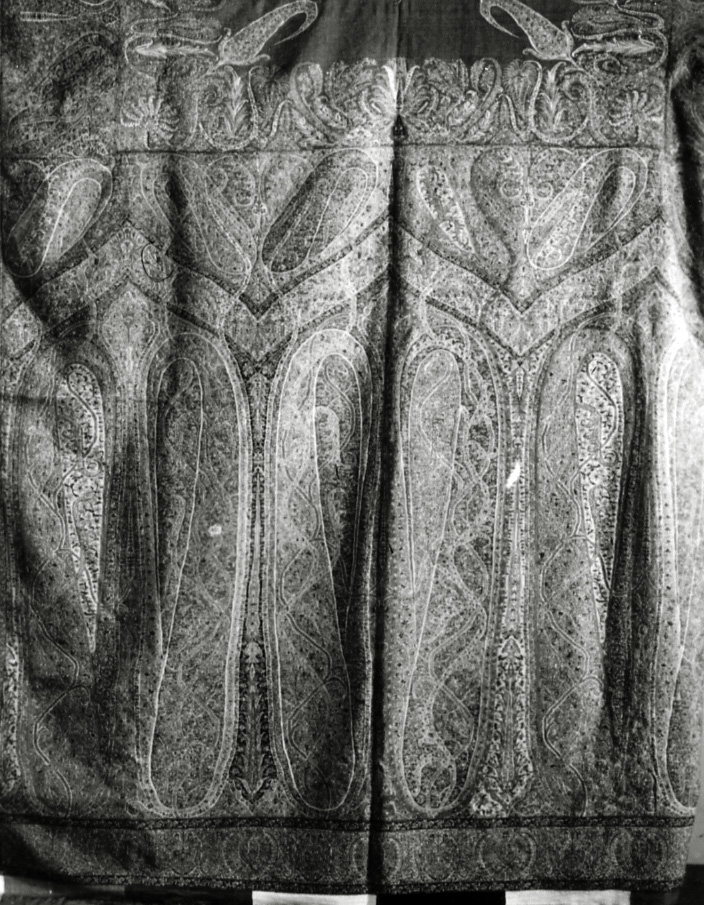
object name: Costume and Accessories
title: Shawl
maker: India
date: c. 1840/45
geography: India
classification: textile; weaving; costume; dress (garment); clothing